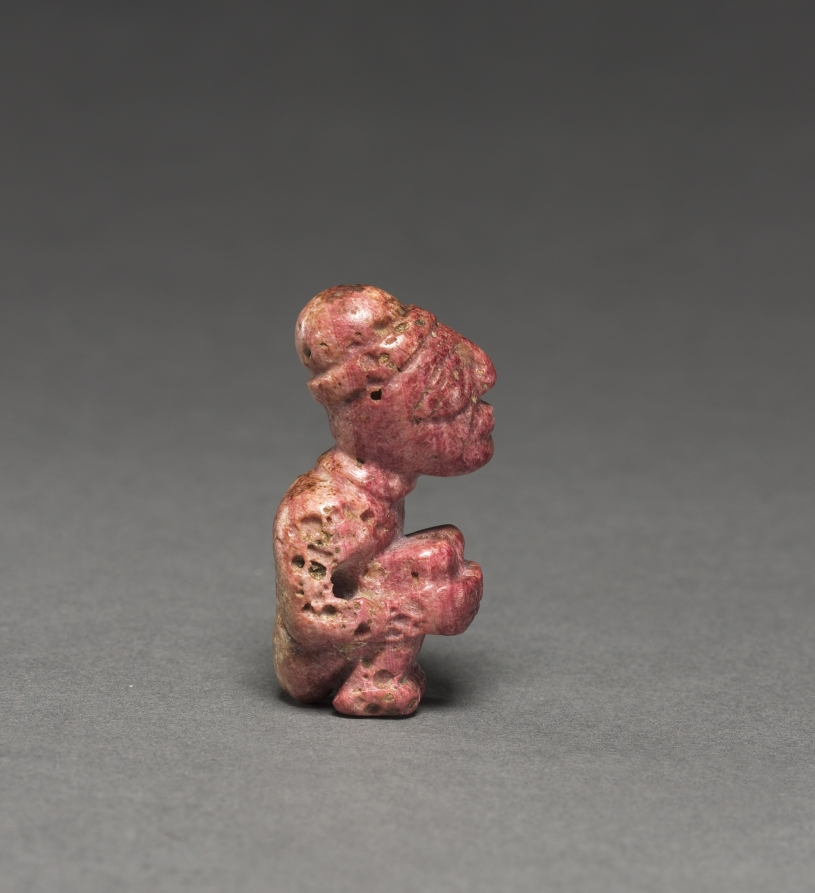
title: Seated Figurine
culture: Peru, Inca, 15th-16th century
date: c. 1400–1540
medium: stone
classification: Sculpture